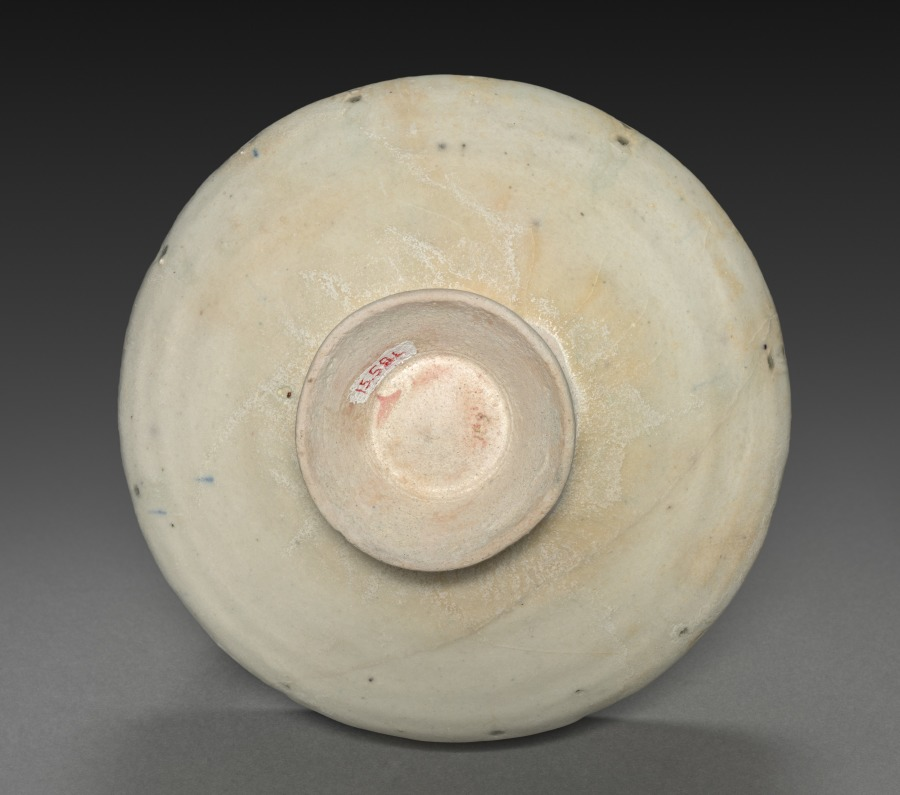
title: Footed Bowl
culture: Iran, probably Kashan, Seljuq period, late 12-early 13th century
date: late 1100s–early 1200s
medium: fritware, pierced and underglaze painting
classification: Ceramic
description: Iranian potters created transparency by piercing and glazing frit-body walls. Here, triangles and rosettes decorate incised scallops beneath the blue rim. The footed shape is derived from Iranian metal bowls.